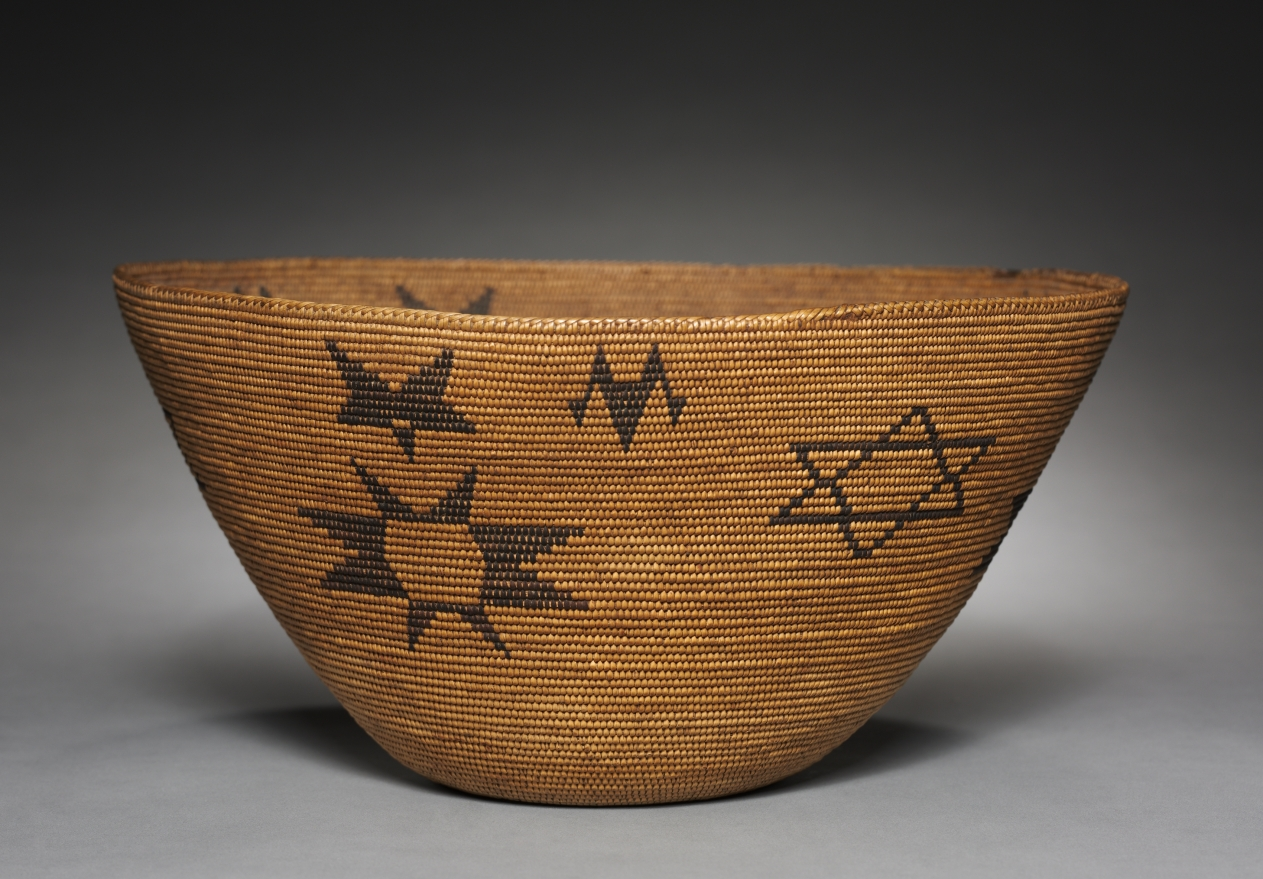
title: Cooking Bowl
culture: Great Basin, Washoe, late 19th- early 20th century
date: 1890s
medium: Willow, Bracken fern root; coiled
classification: Basketry